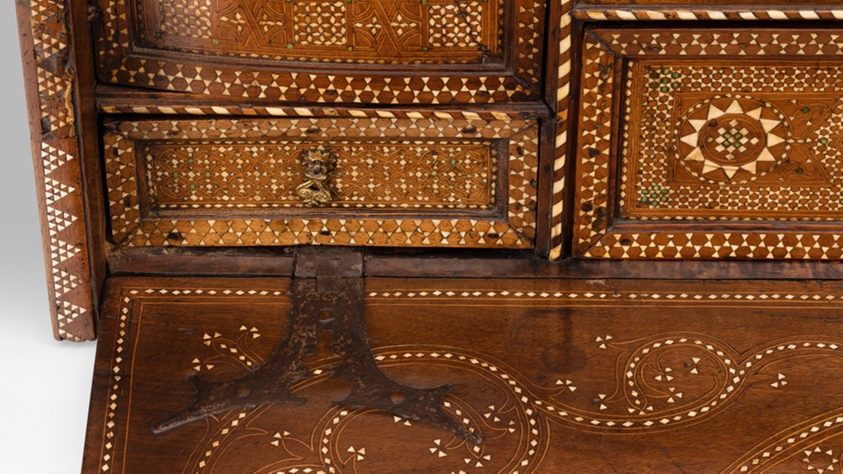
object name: Furniture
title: Writing Cabinet (Escritorio)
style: Islamic, hispano-moresque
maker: Spanish, possibly Granada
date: 1500/50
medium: Walnut, boxwood, bone, iron, copper alloy, and gilding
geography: Granada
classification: furniture; islamic; decorative arts; furnishings; furnishings (transportable); inlay; writing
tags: geometric